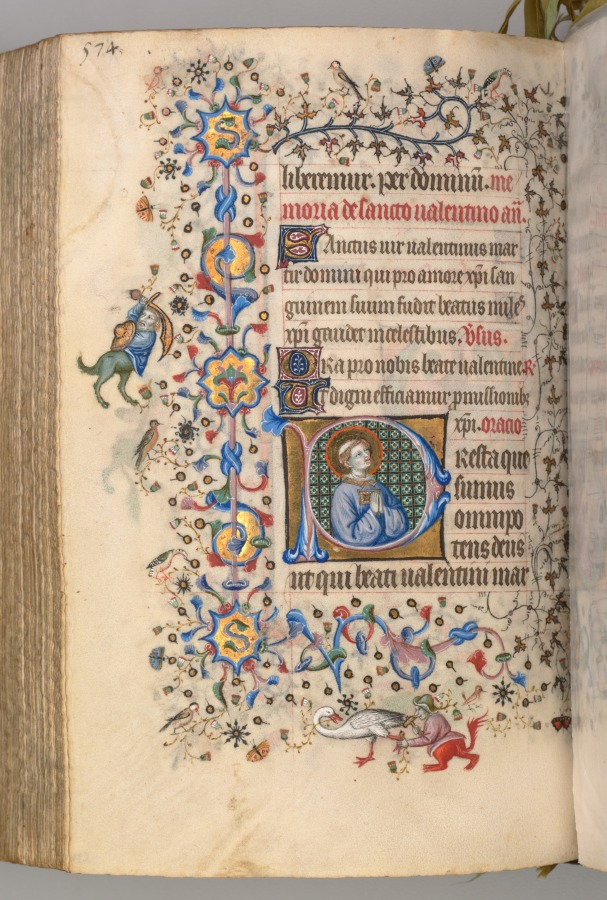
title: Hours of Charles the Noble, King of Navarre (1361-1425): fol. 281v, St. Valentine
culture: France, Paris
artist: Master of the Brussels Initials and Associates (French)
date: c. 1405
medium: ink, tempera, and gold on vellum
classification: Bound Volume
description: This precious volume was obviously highly prized by its owner, the French-born King of Navarre, who had his coat of arms painted on no less than twenty folios. Rather than directly commissioning this manuscript from a specific workshop, it seems that Charles the Noble acquired his book of hours -- perhaps ready-made for the luxury market -- while on a trip to Paris in 1404-05. A collaborative effort, six painting styles are evidenced within the pages of this codex, those of two Italians, two Frenchmen, and two Netherlanders. The painter who was responsible for the planning and decoration of the book, and who produced seventeen of the large miniatures, was a Bolognese artist known as the Master of the Brussels Initials. His principal assistant, responsible for most of the borders, was a Florentine who signed his name "Zecho" da Firenze on folio 208 verso.